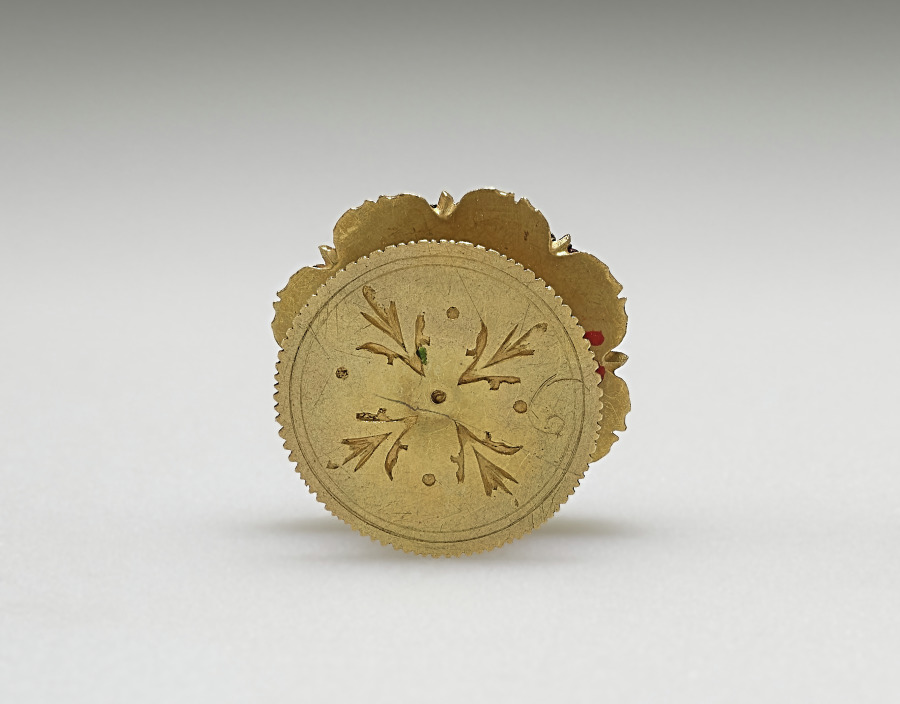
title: Earring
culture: Burma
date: 1800s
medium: gold and rubies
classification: Jewelry